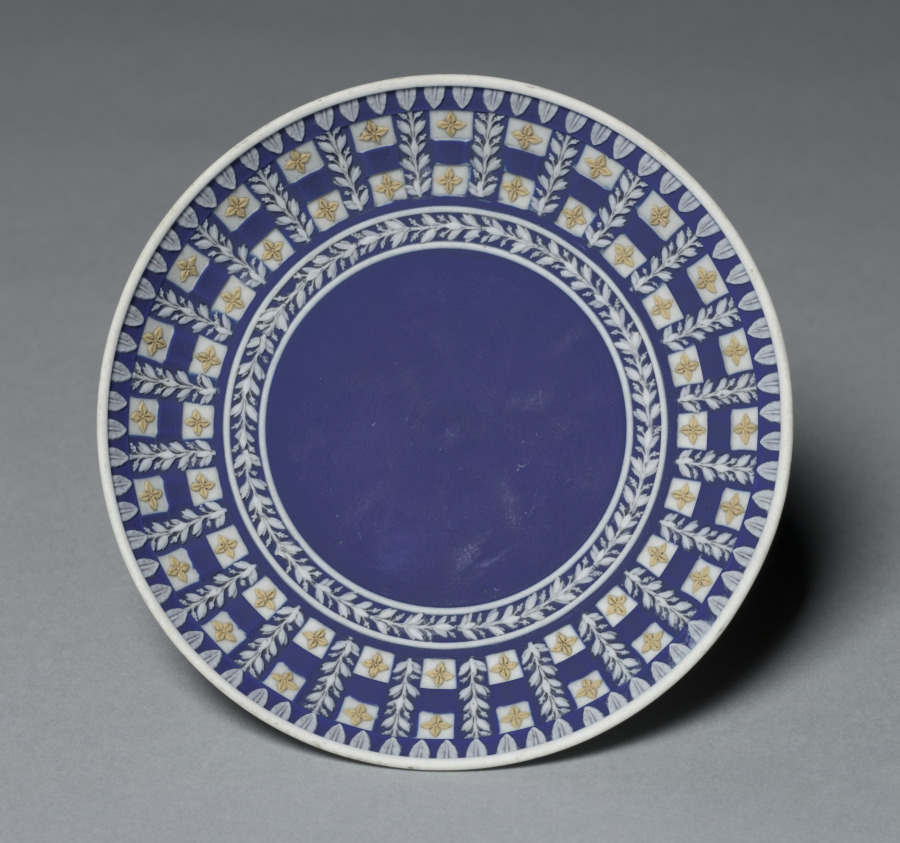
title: Saucer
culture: England, Staffordshire, 18th century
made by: Wedgwood Factory (British)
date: c. 1784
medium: jasper ware with relief decoration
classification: Ceramic